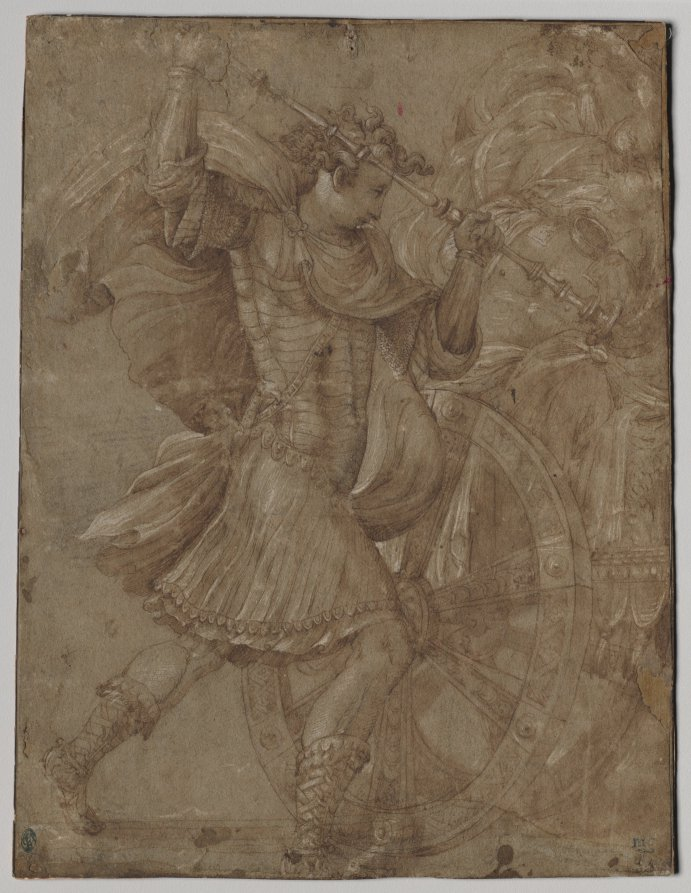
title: Man in Armor beside a Chariot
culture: Italy, 16th century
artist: assistant of Francesco Salviati (Italian, 1510–1563)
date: c. 1550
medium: pen and brown ink and brush and brown wash over black chalk, heightened with white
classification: Drawing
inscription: lower right, in graphite: [illegible] / Elève de Raphael [in parentheses] ; lower right, in graphite(?): [illegible] ; VERSO OF TERTIARY SUPPORT, upper left, in blue crayon: WCA 2302 ; center, in graphite: Maturino / Elève de Raphael [underlined, in parentheses) ; center right, in graphite: Ecole de Rome [in parentheses]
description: This drawing of a young soldier setting fire to a cart of war trophies may represent a rarely depicted legend about the Macedonian king Alexander the Great (356–323 BC), who built one of the largest empires of the ancient world by the time he was 30 years old. Because the heavy spoils of war were slowing down his troops, Alexander set fire to his own cart of goods to encourage his soldiers to do the same. Renaissance princes revered him as a brilliant military strategist. Emperor Maximilian I (reigned 1486–1519), pictured in the equestrian portrait and in the great triumphal car nearby, considered Alexander a distant ancestor.